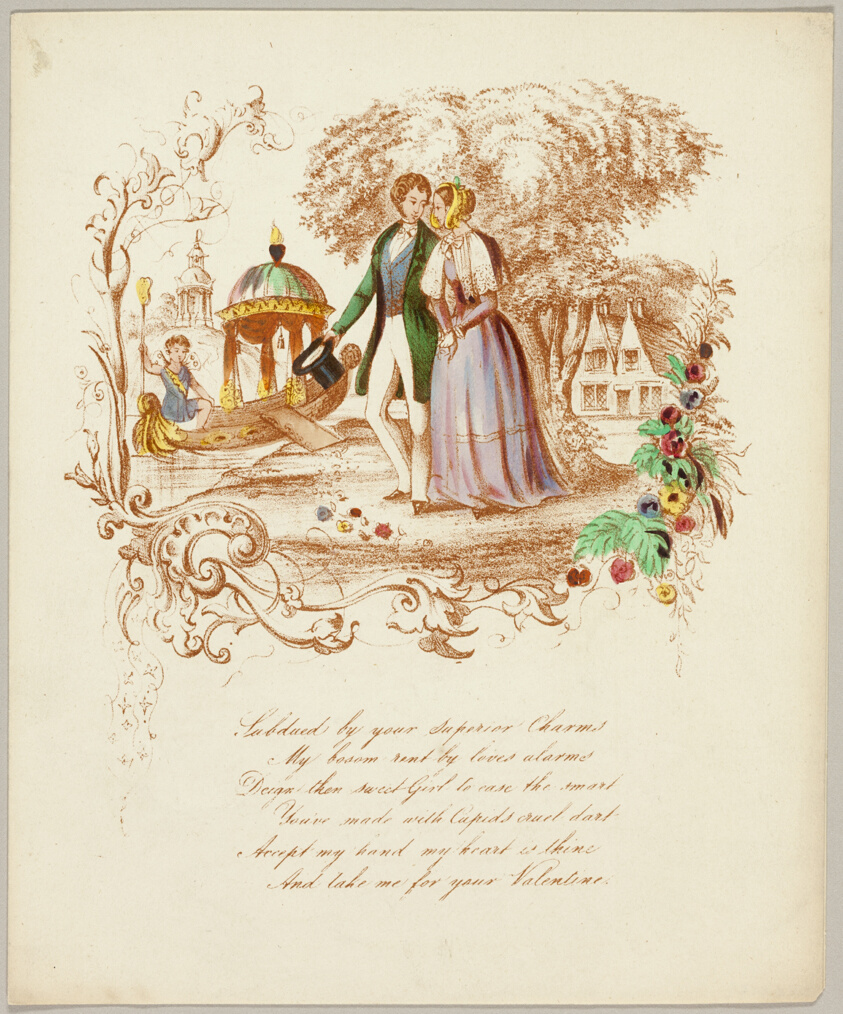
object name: Print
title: Subdued by your Superior Charms (valentine)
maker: Unknown Artist; English, 19th century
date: c. 1842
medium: Lithograph in brown ink with hand-coloring on cream wove paper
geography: England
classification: valentine; prints and drawing; print